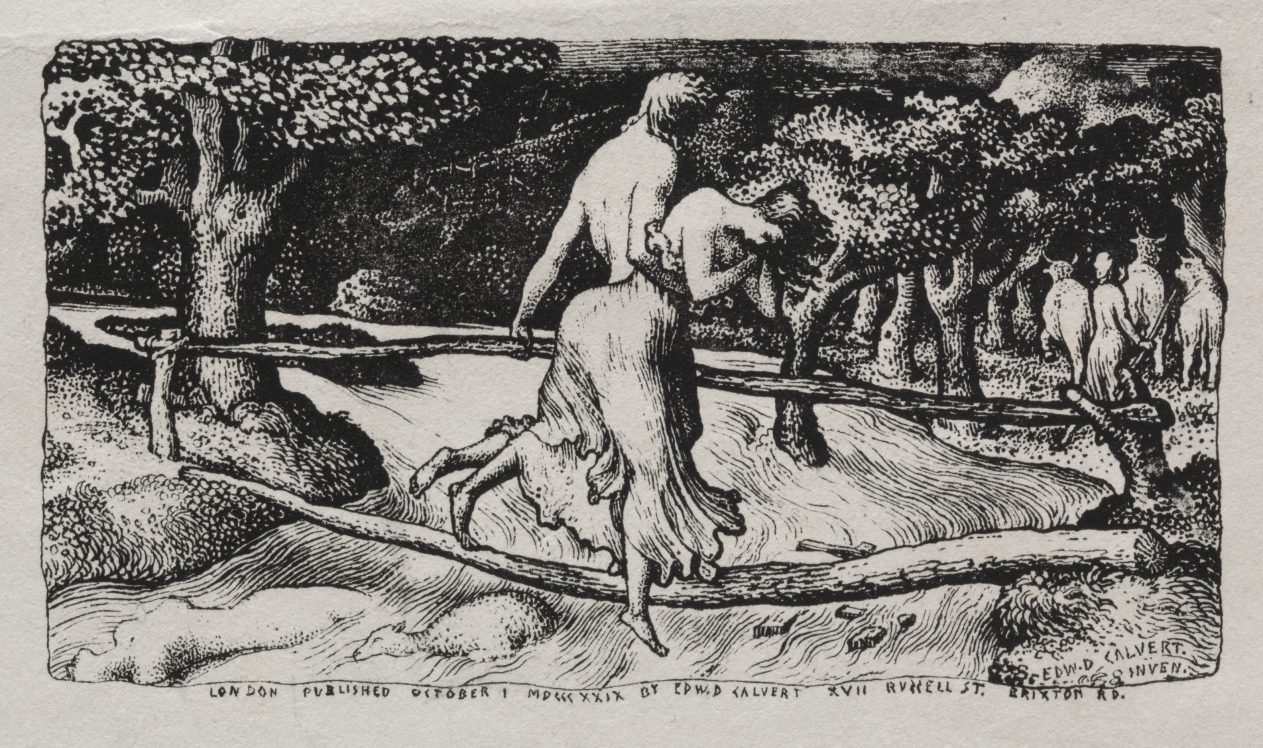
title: The Flood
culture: England, 19th century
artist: Edward Calvert (British, 1799–1883)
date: 1829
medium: lithograph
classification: Print